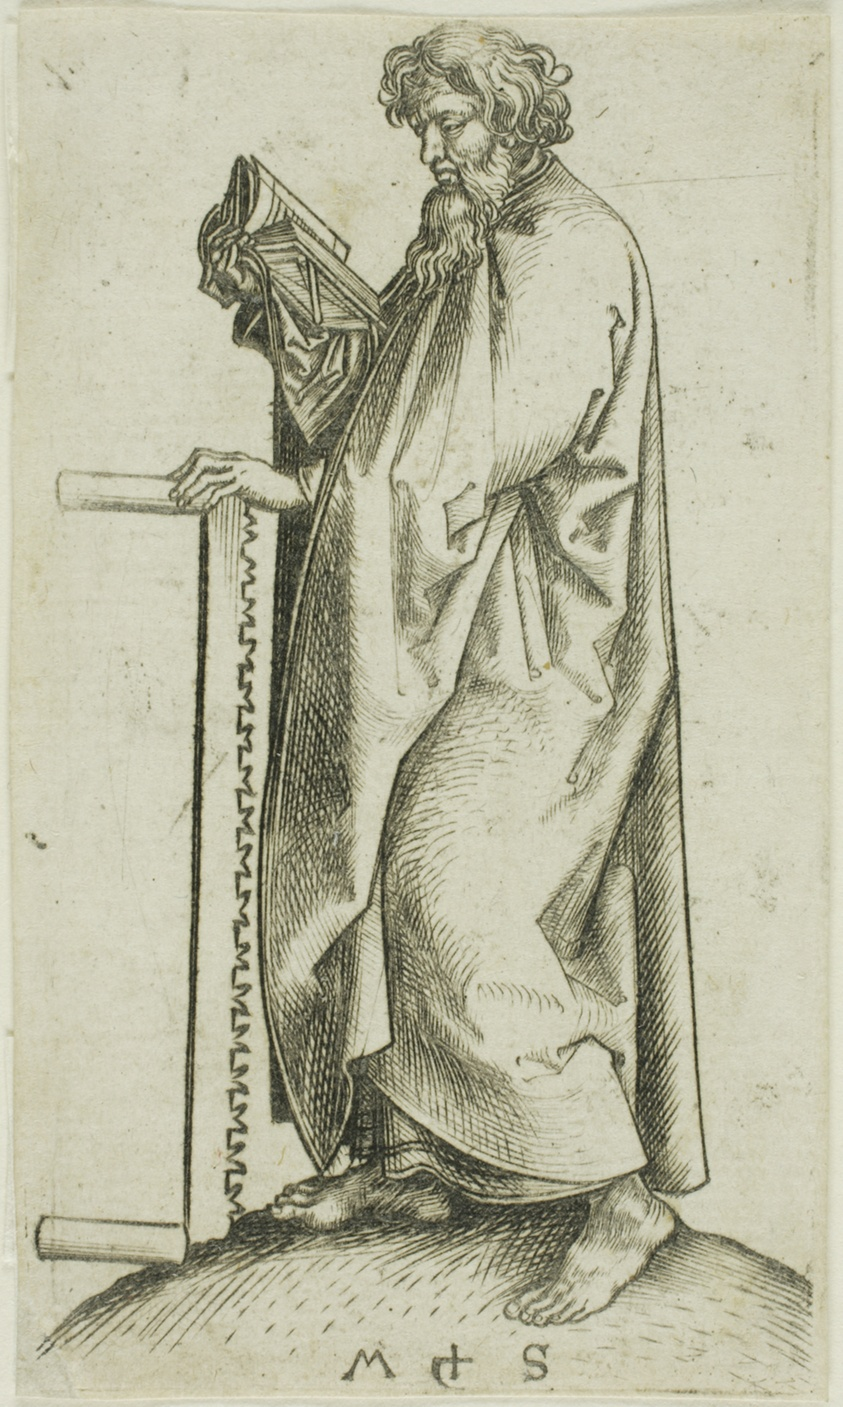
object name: Print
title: St. Simon, from Apostles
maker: Martin Schongauer (German, c. 1430/50-1491)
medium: Engraving on paper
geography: Germany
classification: engraving; print; prints and drawing